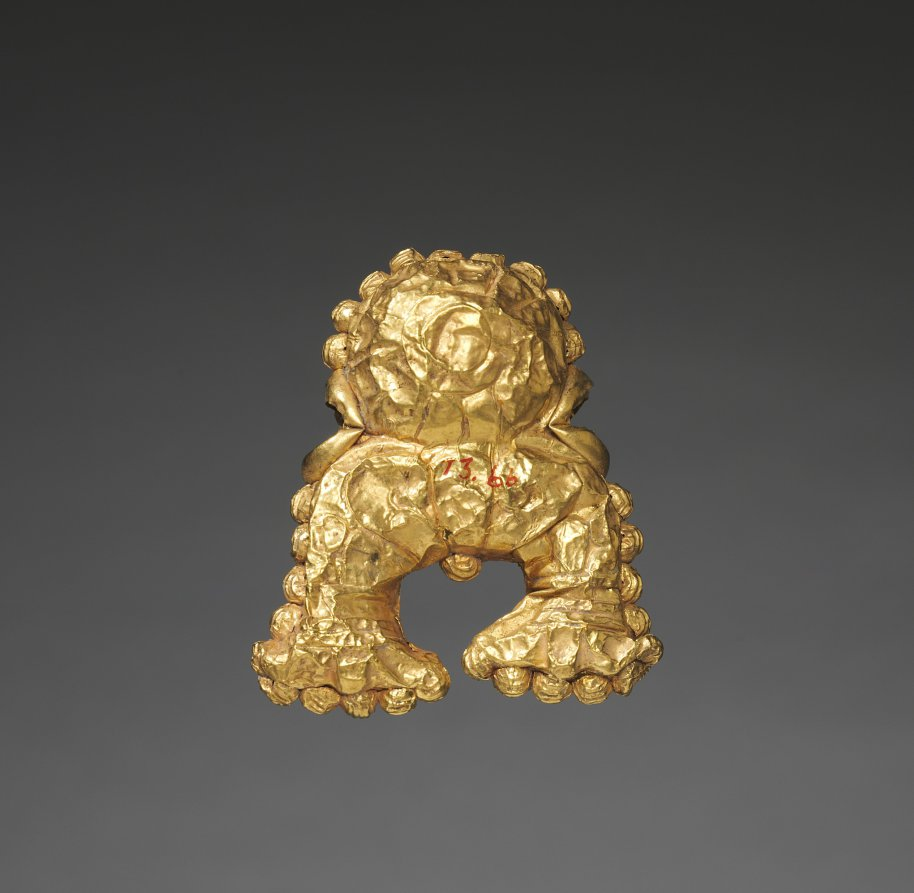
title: Triratna Pendant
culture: India, Uttar Pradesh or Madhya Pradesh, Shunga period (185–78 BCE)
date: 185–72 BCE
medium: gold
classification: Jewelry